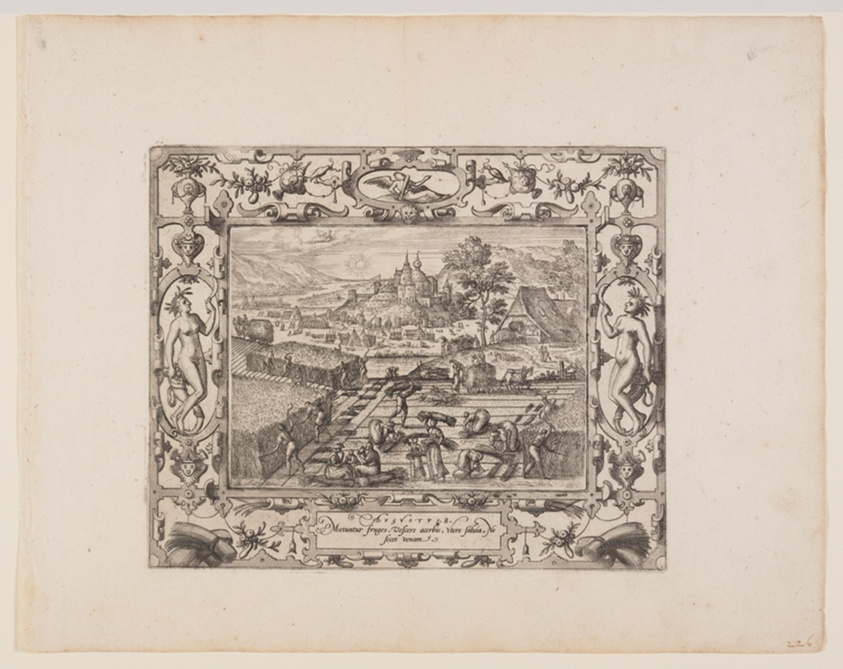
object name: Print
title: August, from The Twelve Months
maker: Pieter van der Borcht (Flemish, 1545–1608) [image]; Johannes van Doetecum (Netherlandish, 1528/32–1605) and Lucas van Doetecum (Dutch, died before 1584) [border]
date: c. 1574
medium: Etching from two plates on ivory laid paper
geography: Flanders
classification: etching; paper; print; prints and drawing